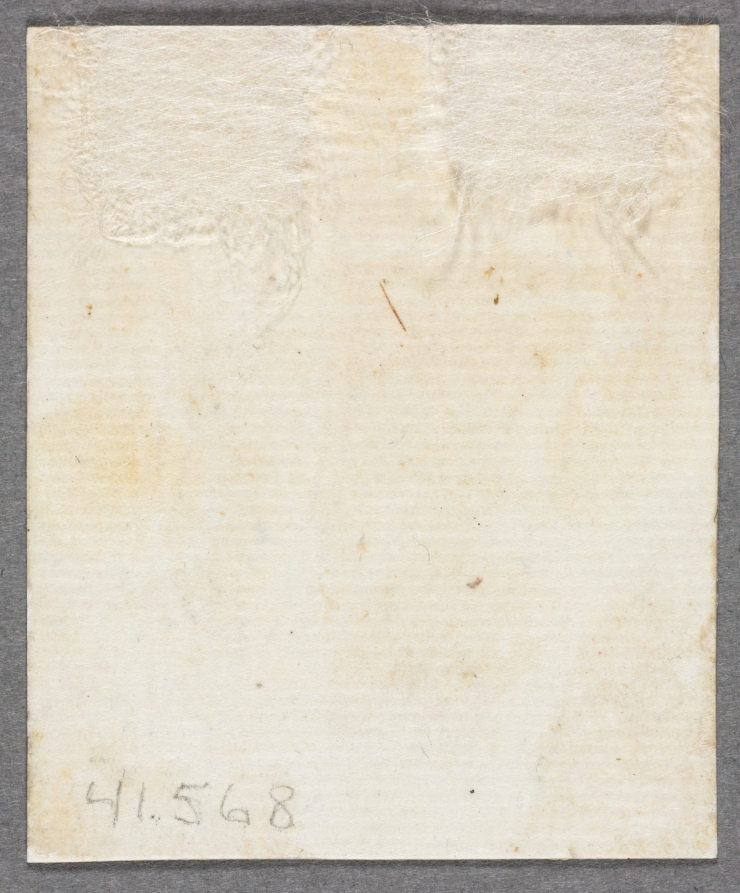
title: Portrait of a Woman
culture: England, 18th century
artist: John I Smart (British, 1741–1811)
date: c. 1775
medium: graphite and wash on laid paper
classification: Portrait Miniature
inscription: inscribed on paper backing in graphite, upside down, at upper right: 139; also on paper backing in graphite on slant at lower right corner: La belle/Gabrielle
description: Although it is impossible to say if it was always part of the artist’s process to execute a preparatory sketch prior to painting each miniature, we do know that John Smart retained many hundreds of these sketches. A group of preparatory sketches—of which this portrait is one—descended through the Smirke family after Smart’s daughter Sarah gave a sketchbook containing preparatory portrait studies to her friend Mary Smirke, sister of the celebrated Victorian architect Sydney Smirke. This book was probably broken up around 1877 when it was divided between Sydney’s daughters Mary Jemmett and Mrs. Lange, whose portions were both sold at auction in 1928. This portrait was assigned the historically colorful but fictitious title of “La Belle Gabrielle” at some point after memory of its true identity had been lost. Giving illustrious titles to portraits of unknown sitters was a popular strategy adopted by dealers during the nineteenth and twentieth centuries, often applied to miniature portraits and, in particular, to Smart’s sketches of women. The inscription on the paper backing is not in Smart’s hand, and when the paper backing was removed in 1993, no inscriptions were discovered on the back of the drawing itself. Only the sitter’s head and neck are drawn, and a low-necked dress is faintly suggested. Her head is turned to the right, and her light-colored hair is dressed high, with flat curls against the back of her head. She has brown eyes, and the color of her lips is extremely faded, though the hint of a ruddy complexion remains. Her sagging jaw line and the lines beneath her eyes suggest that this sitter was painted as a mature woman. The background is unpainted. To this date, the finished ivory for which this preparatory sketch was presumably undertaken has not been discovered.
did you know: Sketches helped John Smart work out the particulars of a portrait before commencing the miniature on ivory; they were useful in the event that a duplicate might later be required.